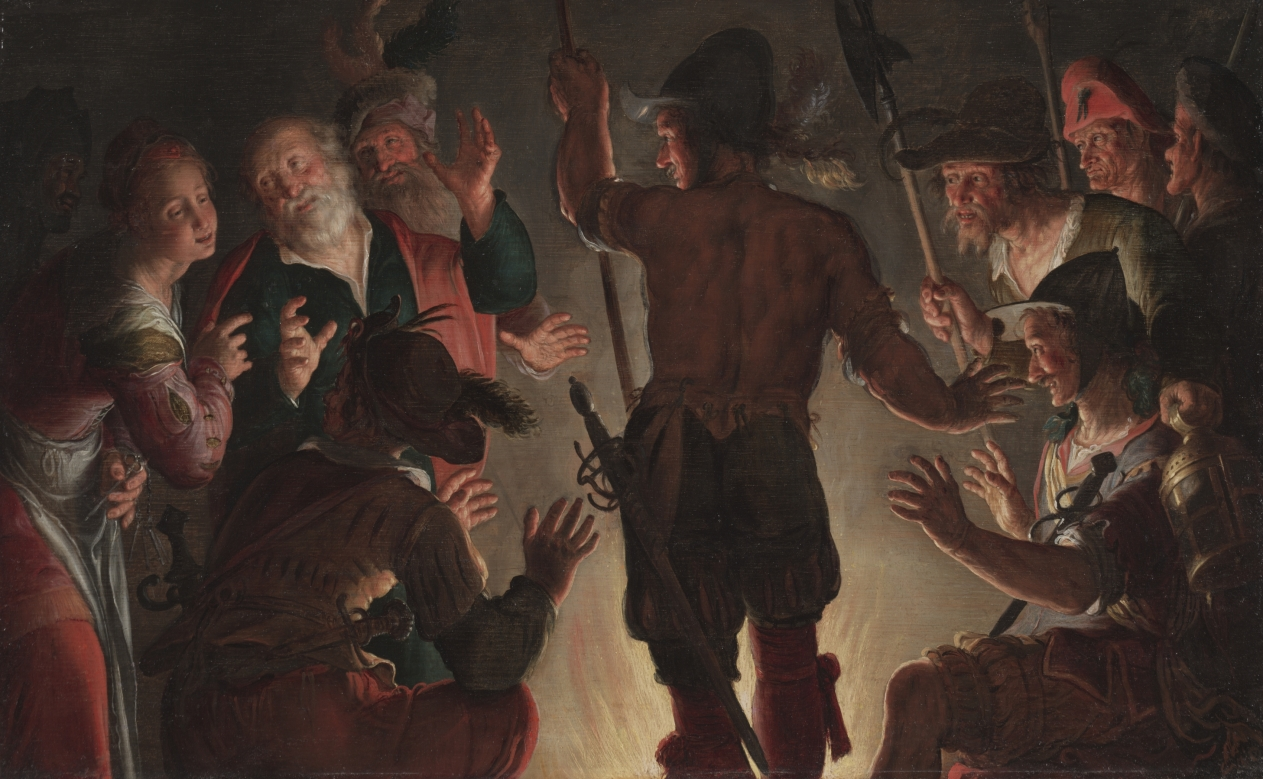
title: The Denial of Peter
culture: Netherlands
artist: Peter Wtewael (Dutch, 1596–1660)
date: c. 1624–28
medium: oil on wood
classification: Painting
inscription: Signed upper right: "Pet[...] / W[...]"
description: Wtewael depicted the moment after the Last Supper when the apostle Peter (at the left) denied knowing Jesus in order to protect himself from Roman soldiers searching for Christ's followers. Few works by this artist are known, and he draws on an unusual combination of styles. The dramatic use of light derives from Dutch followers of the Italian painter Caravaggio, in vogue around 1625, while the twisting bodies, startlingly low viewpoint, and tight detailing come from a more refined, courtly mode more popular earlier in the century.